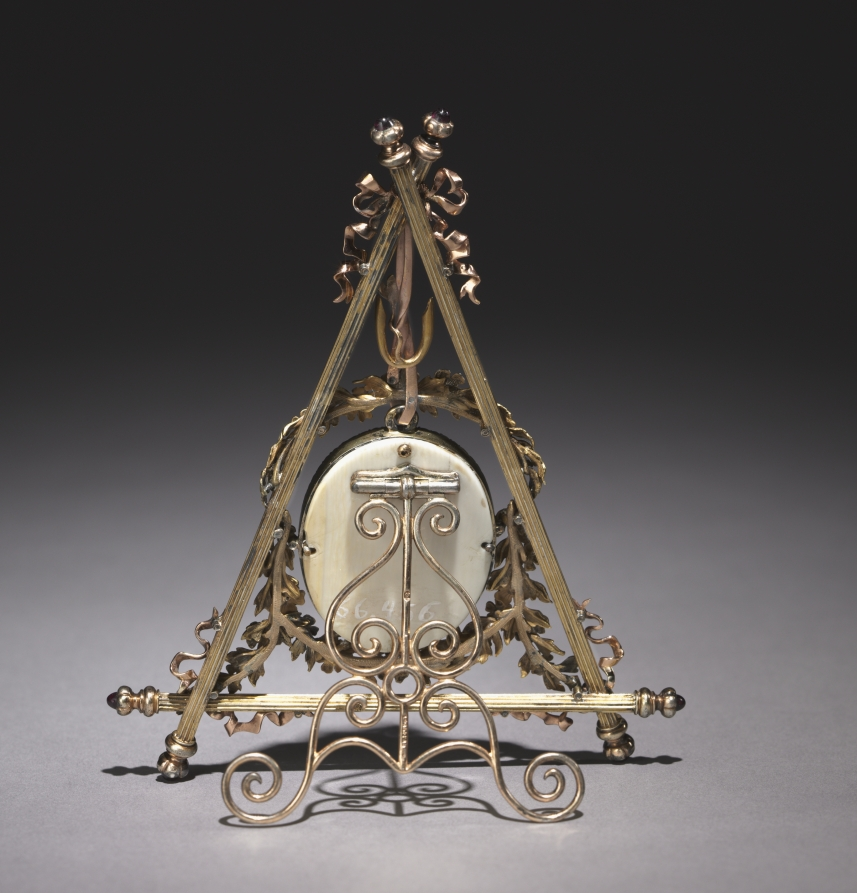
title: Framed Miniature of Tsarina Alexandra Feodorovna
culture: Russia, St. Petersburg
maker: House of Fabergé (Russian, 1842–1918)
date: 1896–1908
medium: gold, rubies, diamonds, gouache, ivory, glass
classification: Portrait Miniature